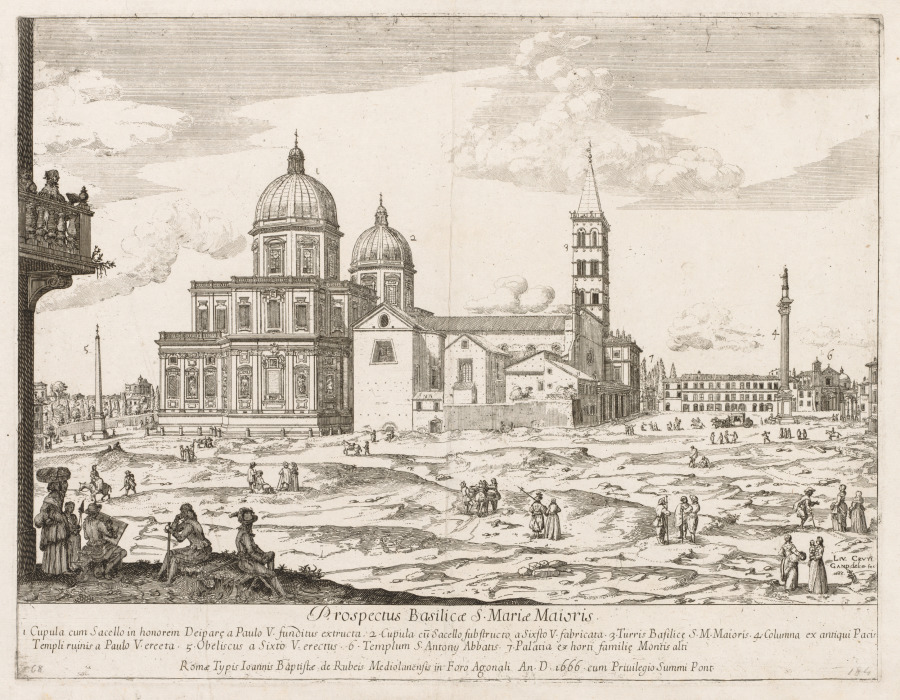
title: Santa Maria Maggiore from "Prospectus Locurum Urbis Romae Insign[ium]"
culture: Flanders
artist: Lievin Cruyl (Flemish, c. 1640-c. 1720)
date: 1666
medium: etching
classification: Print